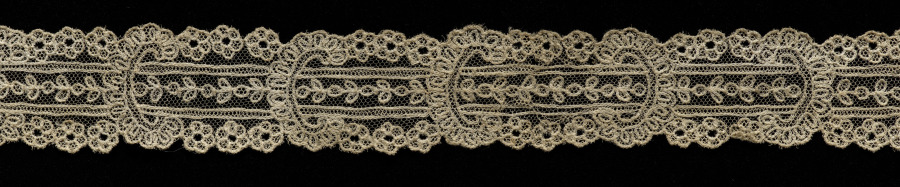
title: Lace Strip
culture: Flanders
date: 1800s (after 1810)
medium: Machine made lace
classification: Lace